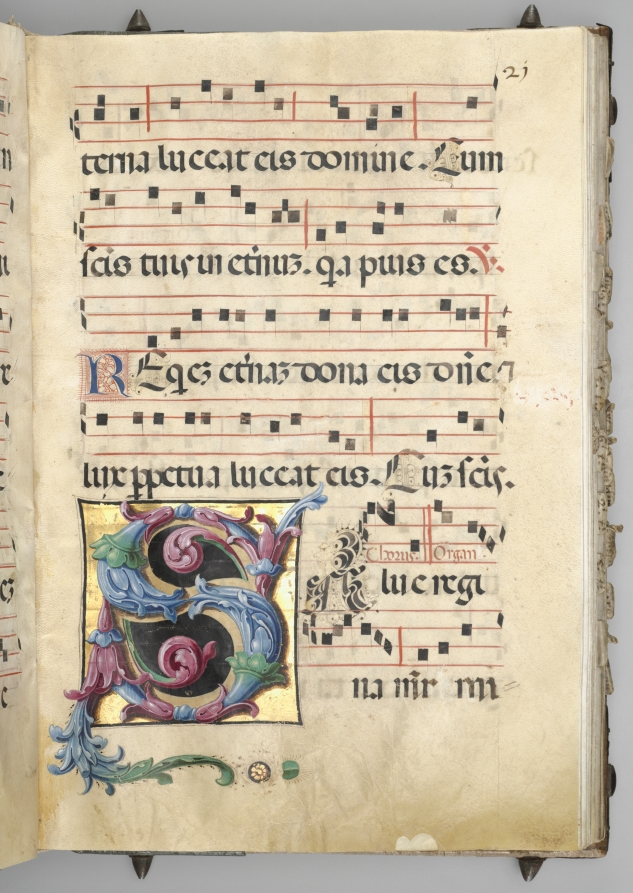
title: Gradual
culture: Italy, Verona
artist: circle of Girolamo dai Libri (Italian, 1474–1555)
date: c. 1520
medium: ink, tempera, and gold on parchment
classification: Manuscript